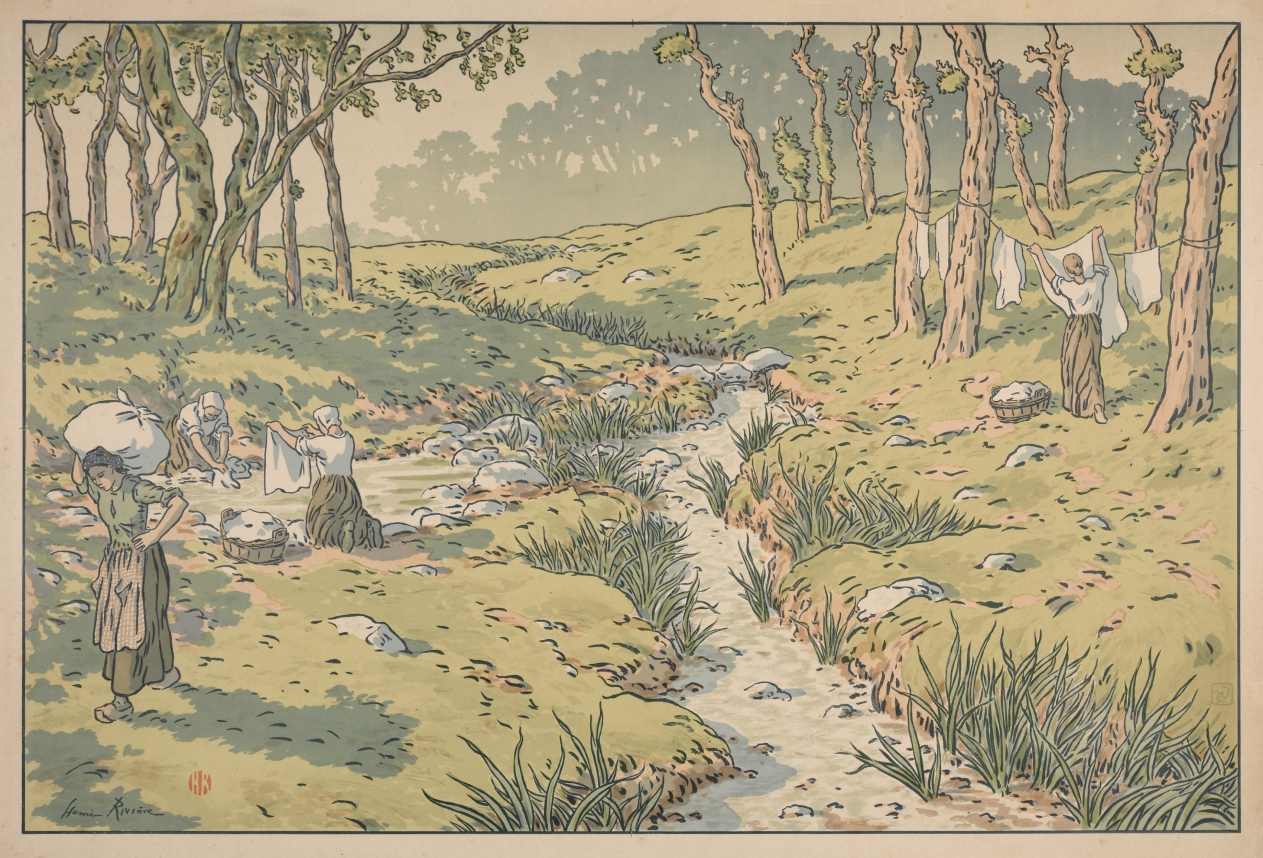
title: Aspects of Nature: The Stream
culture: France, 19th century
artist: Henri Rivière (French, 1864–1951)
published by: Printed by Verneau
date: 1898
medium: color lithograph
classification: Print